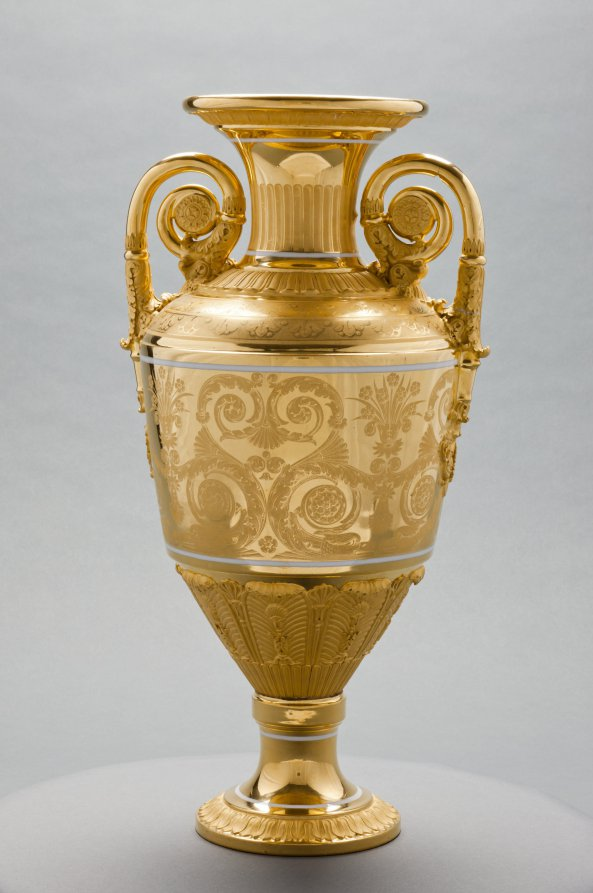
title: Vase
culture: Russia, St. Petersburg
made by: St. Petersburg Imperial Porcelain Factory (Russian)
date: c. 1820–1830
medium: gilt porcelain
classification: Ceramic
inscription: inscribed: "Moreau" in gold near lip.